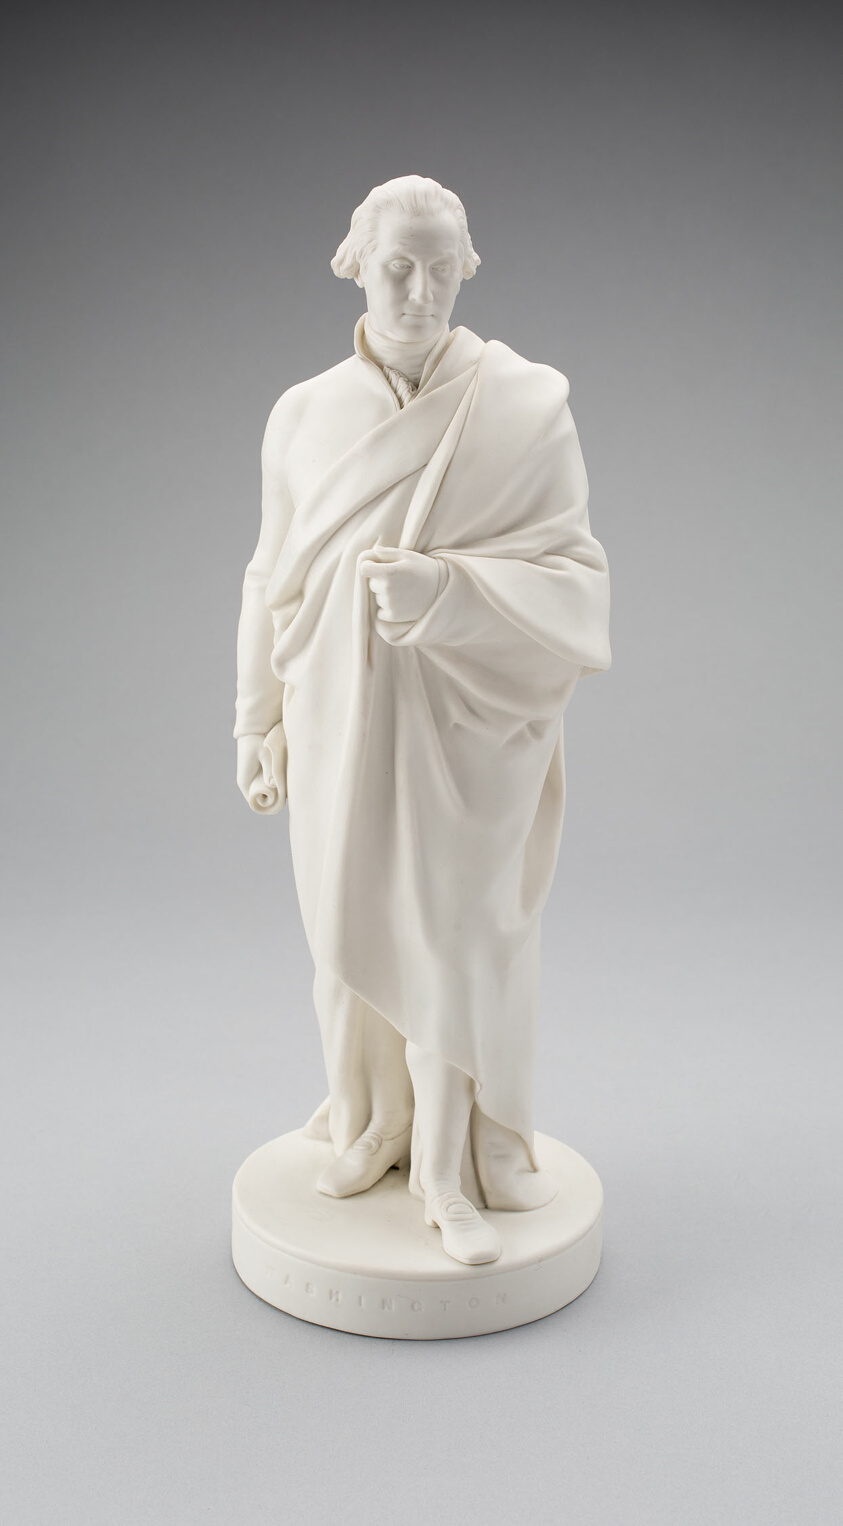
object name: Sculpture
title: George Washington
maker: Artist unknown (English or American, 19th century)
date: c. 1875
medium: Parian porcelain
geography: England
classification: sculpture; american decorative arts; art of the americas; ceramics; american arts; decorative arts